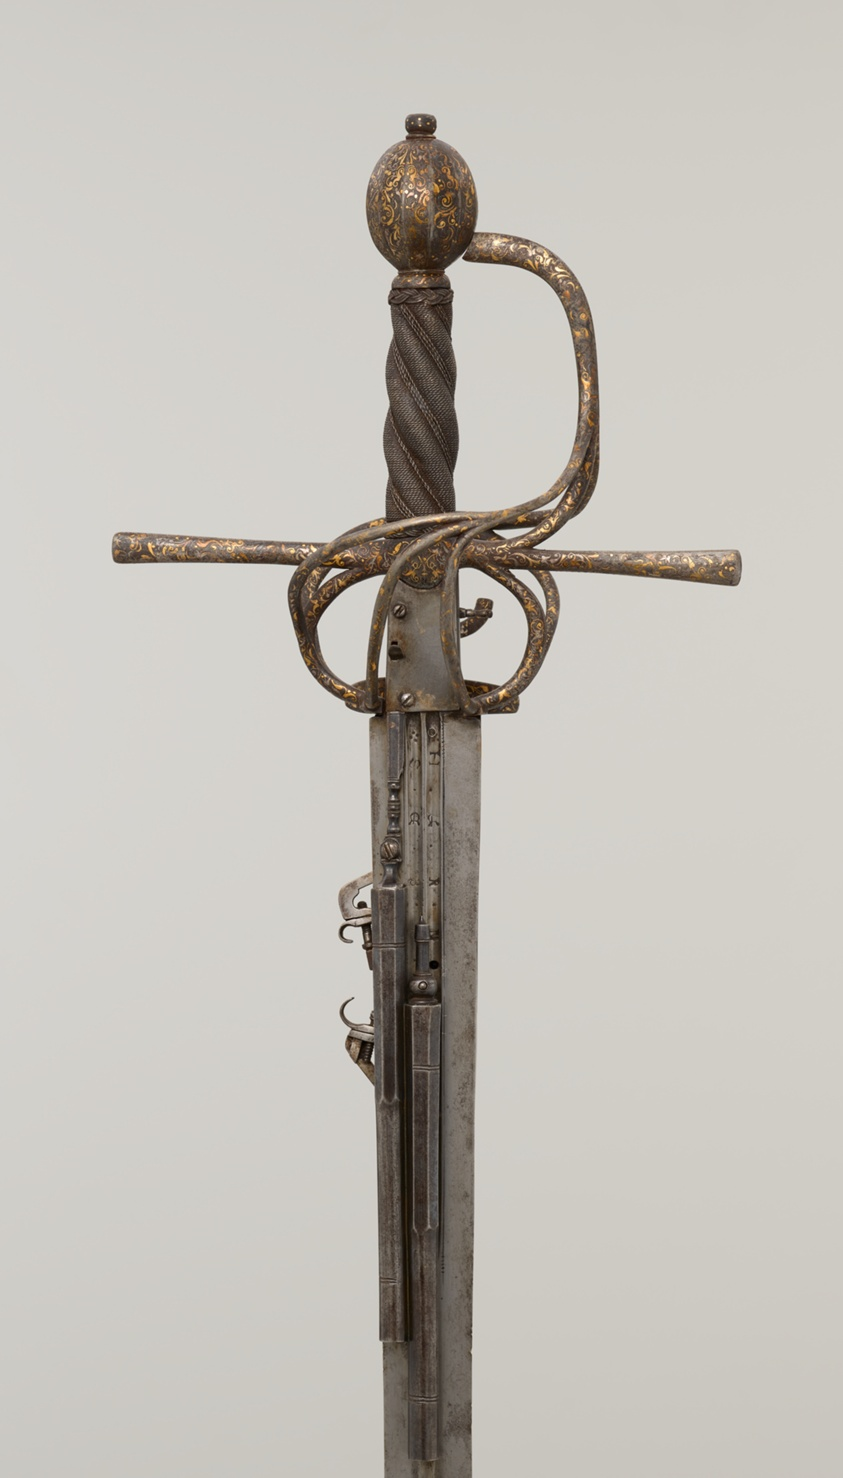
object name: Arms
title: Rapier Combined with two Wheel-Lock Pistols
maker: German; Bladesmith: Hernandez Sebastian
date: c. 1600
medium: Steel, iron, brass, gold, silver, gilding, and wood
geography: Germany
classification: combination weapon; arms; arms and armor